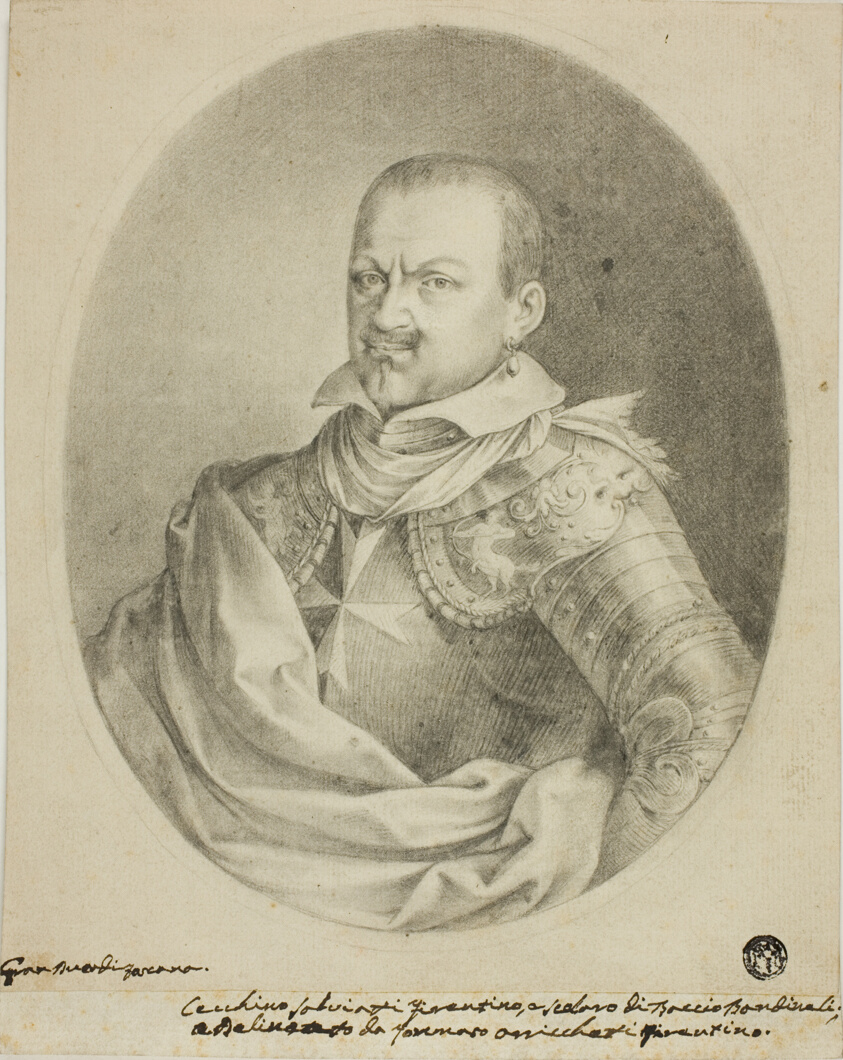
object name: Drawing and Watercolor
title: Portrait of Member of Medici Family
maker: Unknown Italian (18th century)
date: 18th century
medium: Black chalk, with touches of stumping, on cream laid paper, laid down on ivory laid paper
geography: Italy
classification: chalk; drawings (visual works); prints and drawing